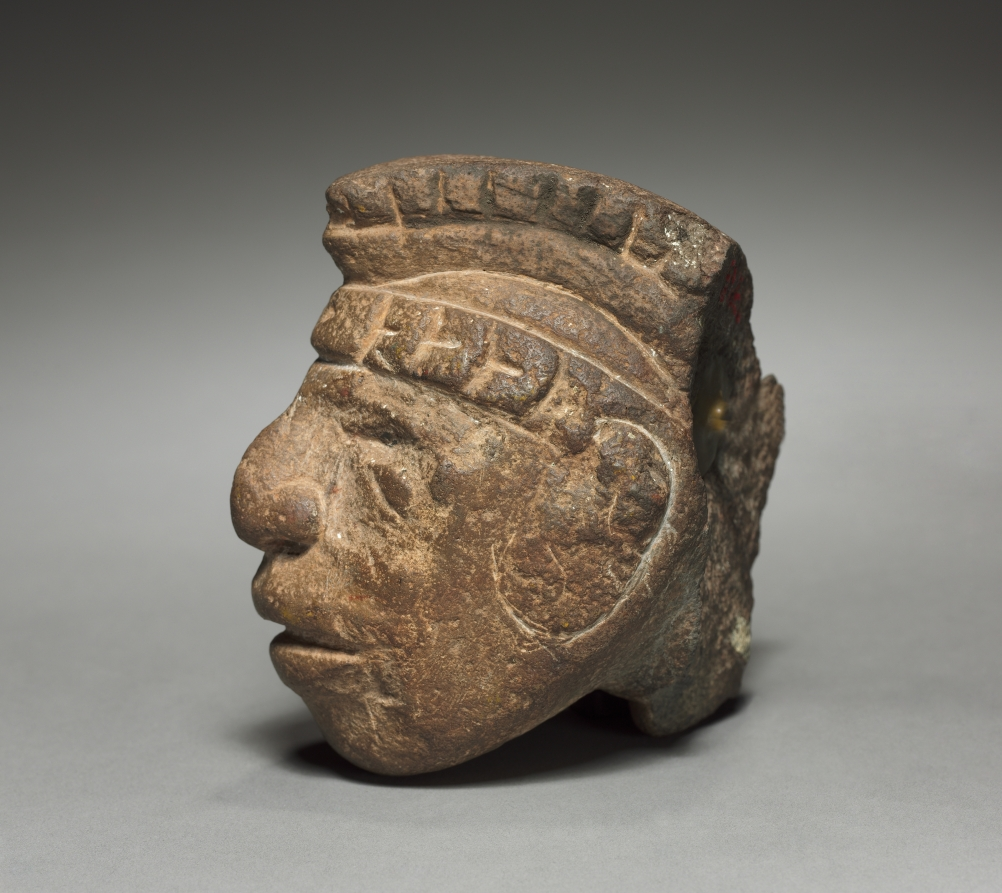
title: Head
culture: Mexico, Classic Veracruz (Totonac or Tajin)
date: 600–1100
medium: stone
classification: Sculpture